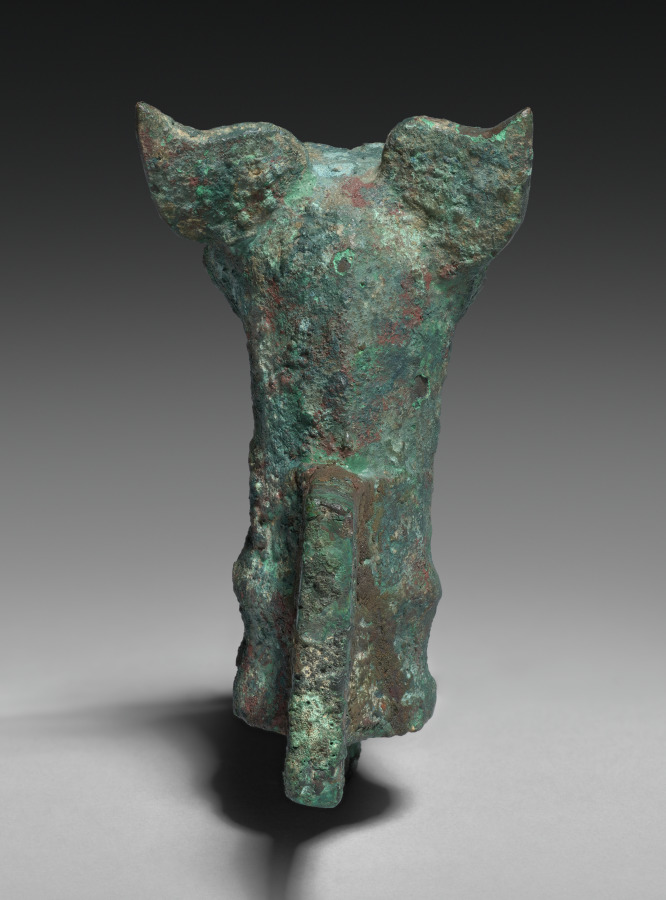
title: Axe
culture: China, Shang dynasty (c. 1600–c. 1046 BCE)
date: 1766–1045 BCE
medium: bronze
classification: Metalwork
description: The head of an owl with large eyes and ears, sitting above the blade of a halberd-axe, may have deterred evil and harm from its carrier. Whether such an axe was used in ritual or warfare is not clear.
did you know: A staff or pike would have attached to the blade via the socket below the owl's head.